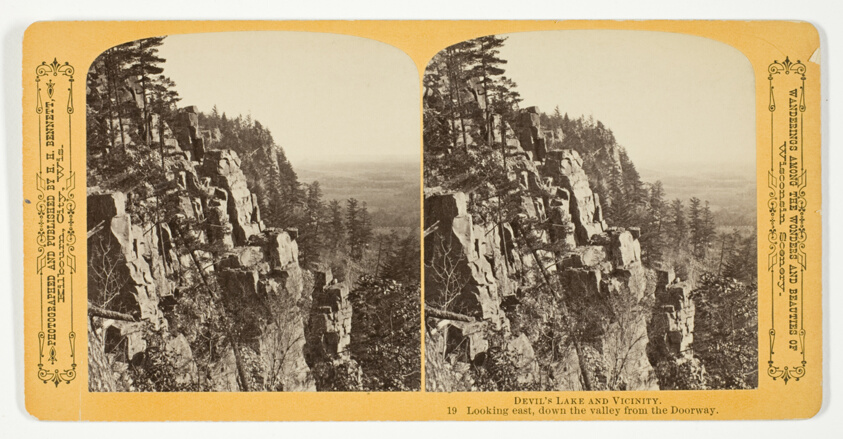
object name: Photograph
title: Looking East, Down the Valley from the Doorway, No. 19 from the series "Devil's Lake and Vicinity"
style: 19th century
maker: Henry Hamilton Bennett (American, born Canada, 1843–1908)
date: 1870/1908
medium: Albumen print, stereo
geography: United States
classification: stereograph (albumen); albumen silver print; photographic process; photography; photograph